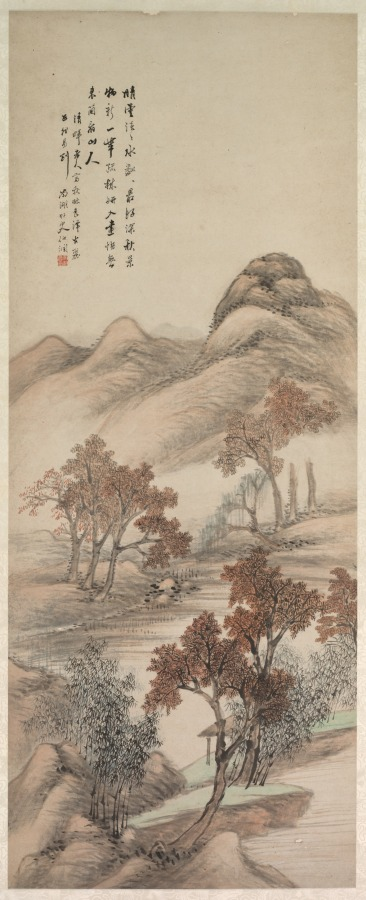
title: Autumn Landscape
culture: China, Jiaxing, Qing dynasty (1644-1911)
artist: Yang Borun (Chinese, 1837–1911)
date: late 1800s–1911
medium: hanging scroll, ink and color on paper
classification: Painting